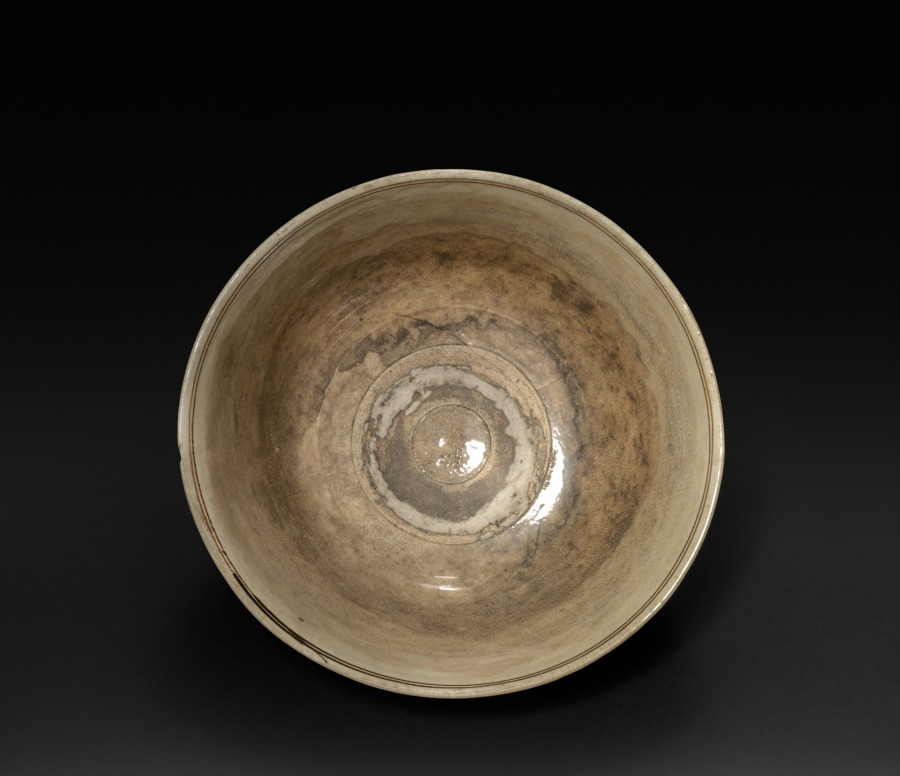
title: Bowl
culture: China, Ming dynasty (1368–1644)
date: 1368–1644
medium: stoneware, Cizhou ware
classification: Ceramic